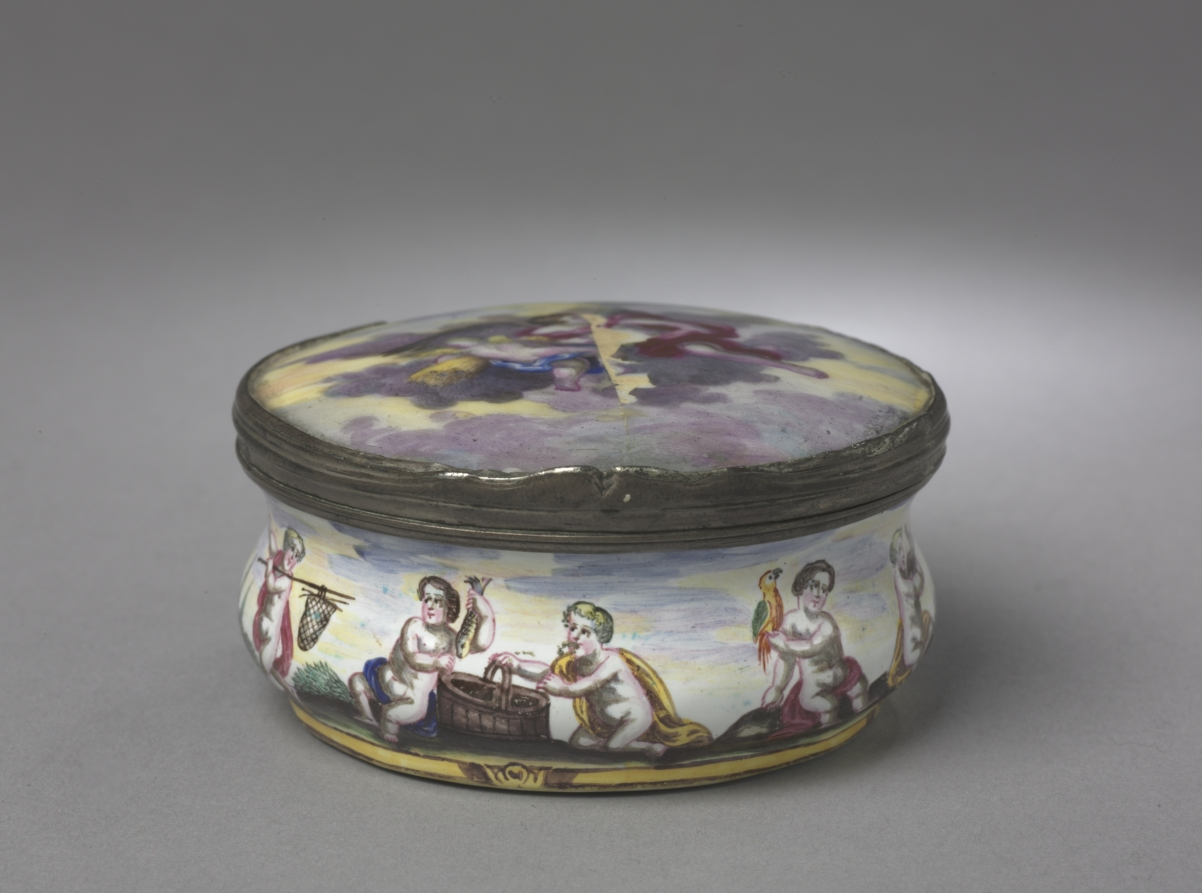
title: Box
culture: Italy or Germany, 18th century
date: 1700s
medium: enamel on copper, metal mounts with traces of gilding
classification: Miscellaneous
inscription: inside box appear the letters "FB" in monogram.